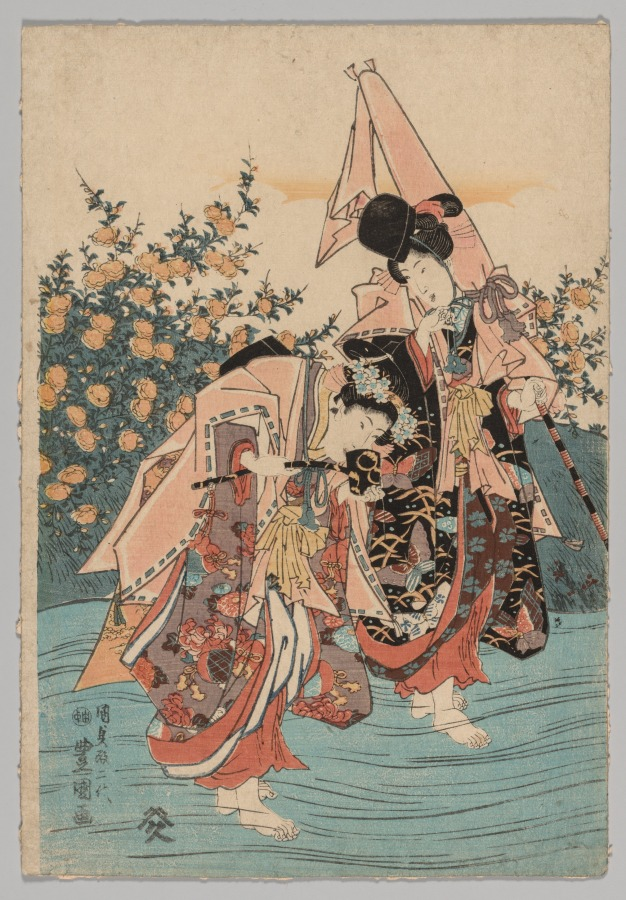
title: Actors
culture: Japan, Edo period (1615–1868)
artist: Utagawa Toyokuni (Japanese, 1769–1825)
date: 1769–1825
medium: color woodblock print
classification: Print